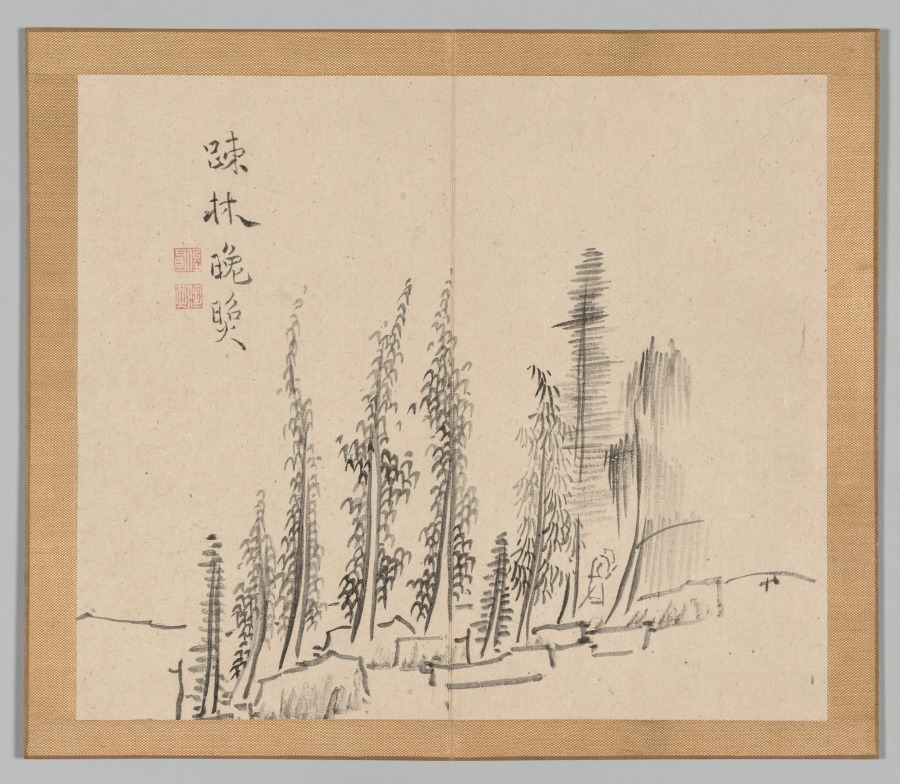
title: Reverberations of Taiga, Volume 2 (leaf 30)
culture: Japan, Edo period (1615–1868)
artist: Aoki Shukuya (Japanese, d. 1802)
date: mid- to late 1700s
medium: double-leaf from a pair of albums; ink and light color on paper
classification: Portfolio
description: Traditionally, young painters in Japan began their studies with an established master-painter. The master's compositions invariably became models that the apprentice copied to learn various ink and brush techniques. Shukuya was a pupil of the famous Kyoto artist Ikeno Taiga, whose style is reflected in these sketches of rocks, trees, and mountains.